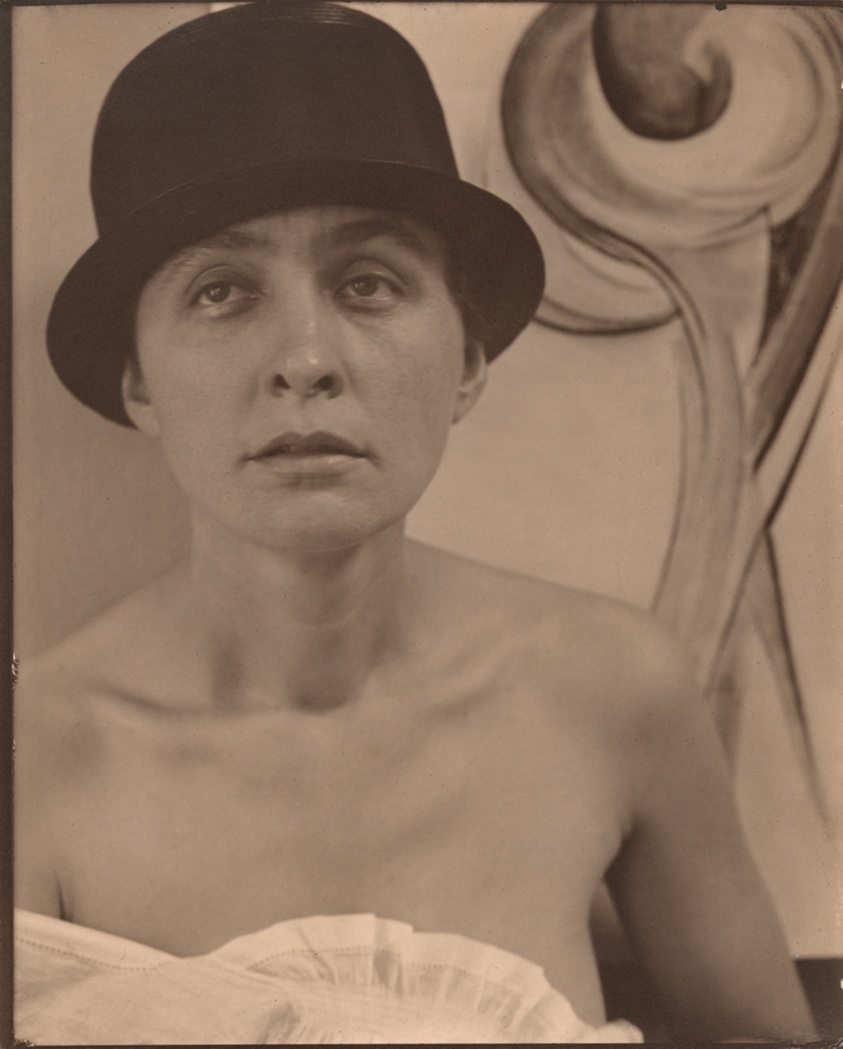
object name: Photograph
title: Georgia O'Keeffe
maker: Alfred Stieglitz (American, 1864–1946)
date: 1918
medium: Palladium print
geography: United States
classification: palladium print; photographic process; photography; photograph